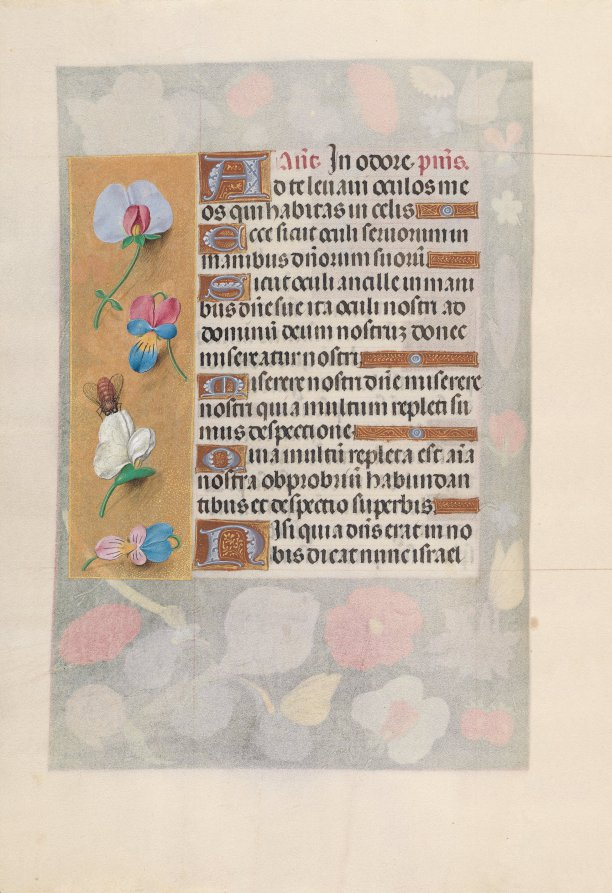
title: Hours of Queen Isabella the Catholic, Queen of Spain: Fol. 137v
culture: Flanders, Ghent and Bruges, late 15th century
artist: Master of the First Prayerbook of Maximillian (Flemish, c. 1444–1519)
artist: and Associates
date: c. 1500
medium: ink, tempera, and gold on vellum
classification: Bound Volume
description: This manuscript was illuminated by a circle of at least five highly organized manuscript painters active in the Flemish cities of Ghent and Bruges. The principal illuminator was Alexander Bening, who painted the majority of the book's miniatures. Manuscripts produced by this circle of artists are renowned for the decoration of their borders, which typically feature a rich variety of realistically-painted flowers, birds, and butterflies. This prayer book, called a book of hours, was intended not for a cleric, but for the private devotions of a lay person-in this case, Isabella the Catholic, Queen of Spain (1451-1504). Isabella's coat of arms embellishes the book's frontispiece. It is unlikely that the book was commissioned by the Queen herself; rather, she probably received it as a diplomatic gift from someone courting her patronage, perhaps Cardinal Francisco Jimenez de Cisneros. A Franciscan friar, Jimenez was dependent upon Isabella for his advancement, first to the post of Queen's confessor in 1492, and then to Archbishop of Toledo in 1495.